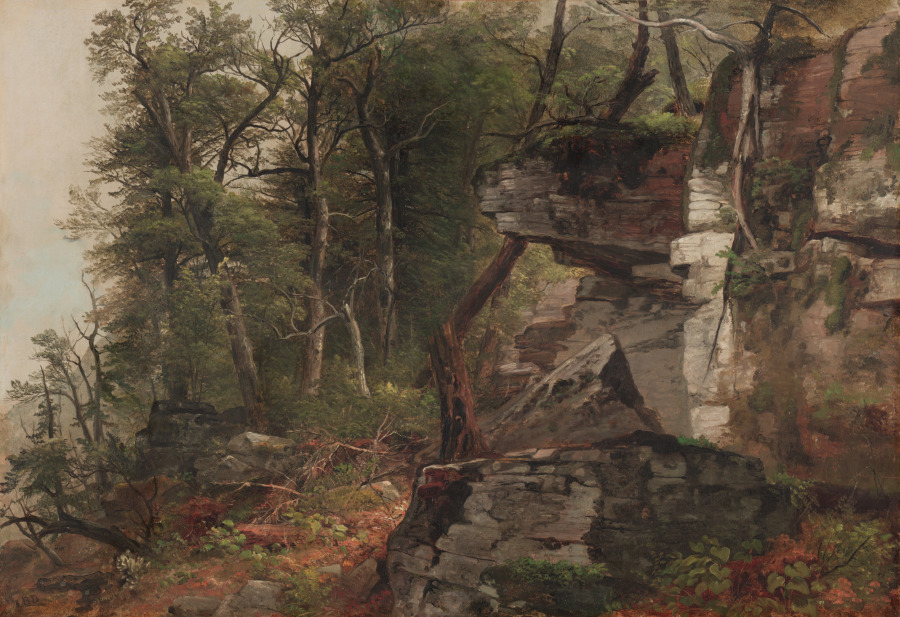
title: Trees on a Rocky Hillside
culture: America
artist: Asher B. Durand (American, 1796–1886)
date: c. 1849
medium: oil on canvas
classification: Painting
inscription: Signed lower left: "ABD"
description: Durand was one of the first American artists to paint outdoors, rather than in the confines of a studio, which was the longstanding tradition. This outdoor oil sketch of a seemingly random corner of the woods offers an intimate view of a rock outcropping amid lush vegetation. Its small-scale, unusually cropped composition contrasts with the sweeping vistas in many other landscapes of the era.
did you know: Before becoming a painter, Durand designed paper currency for the federal government.